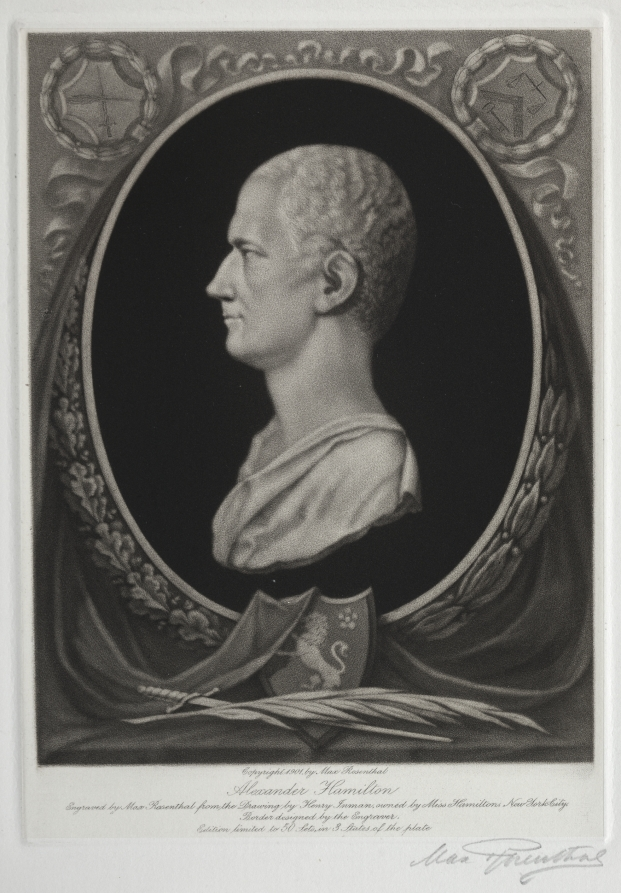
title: Alexander Hamilton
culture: America, early 20th Century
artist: Max Rosenthal (American, 1833–1918)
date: 1901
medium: mezzotint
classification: Print